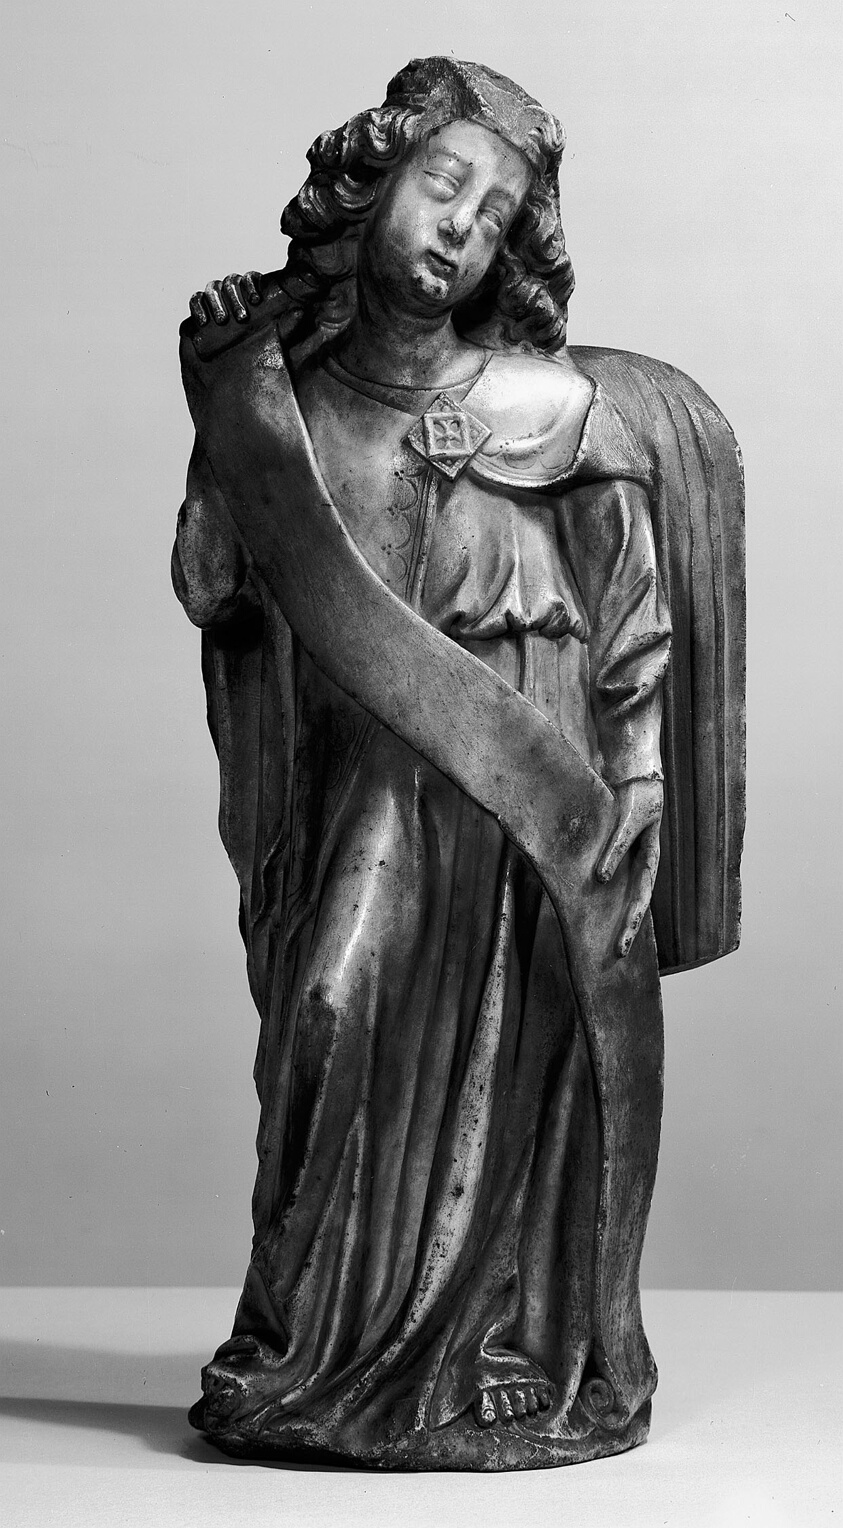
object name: Sculpture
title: Angel Holding Scroll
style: 15th century, medieval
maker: Italian; possibly Tuscany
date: c. 1400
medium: Marble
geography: Tuscany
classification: statuette; sculpture; Italian; marble; sculpture/stone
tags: angels, Christianity, Christian subjects, figure, religion, religious, religious figures, scrolls (motifs)